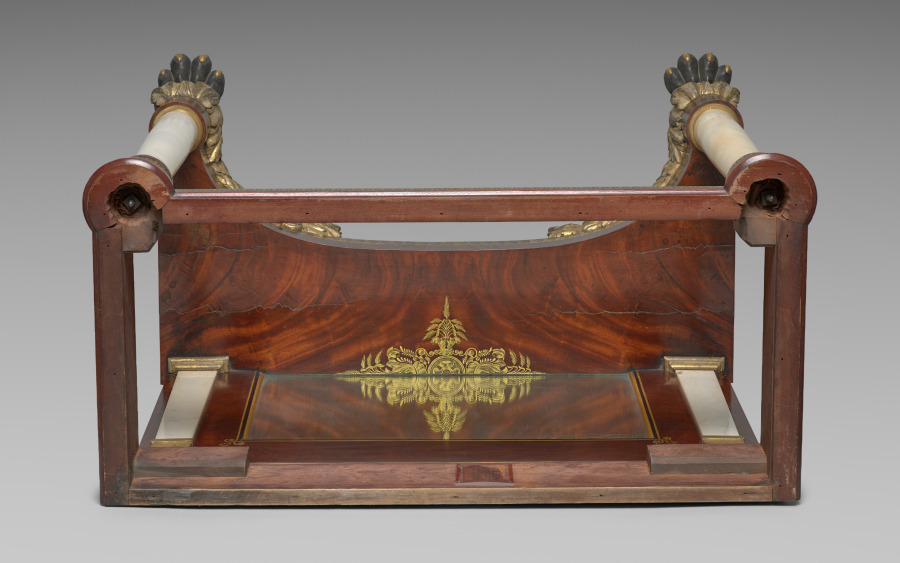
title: Pier Table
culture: America, New York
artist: Joseph Meeks and Sons (American)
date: c. 1829–35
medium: mahogany; marble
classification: Furniture and woodwork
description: Ornamental tables such as this marble-topped example were most often used in rooms on a narrow wall between two windows or just across from them on an opposite wall. Usually a gilded mirror hung above the table to create a single pier of glass, top to bottom, which reflected light around the room. This table’s bold use of carved and stenciled decoration, as well as expensive white marble, indicate that it was owned by a very wealthy family.